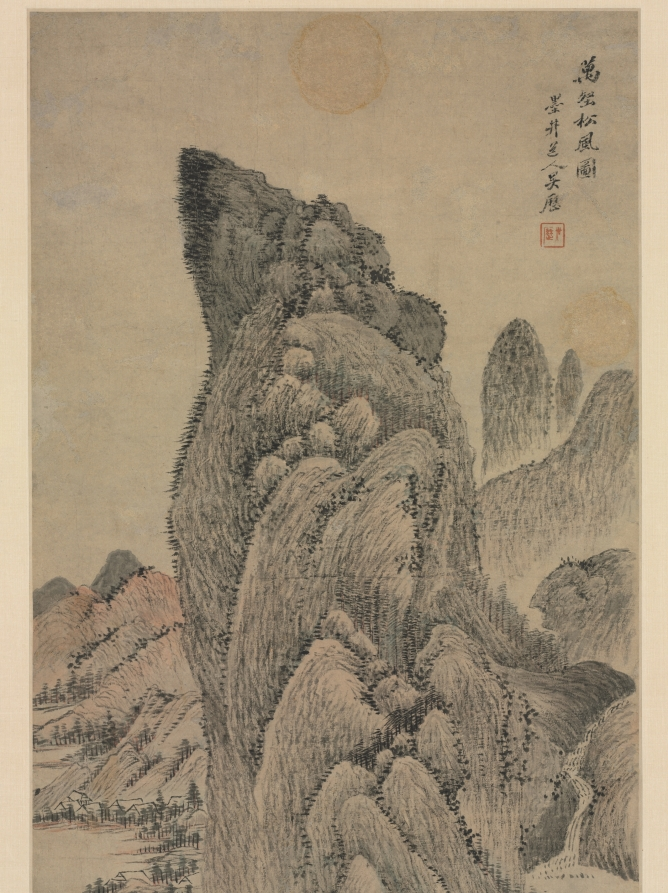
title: Pine Wind from Myriad Villages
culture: China, Qing dynasty (1644-1911)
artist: Wu Li (Chinese, 1632–1718)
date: late 1600s–1718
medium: Hanging scroll; ink and light color on paper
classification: Painting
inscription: Artist's title, signature, and 2 seals: Pine Wind from Myriad Valleys. Mojing daoren Wu Li.[seals] Mojing daoren; Wu Li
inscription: 5 additional seals: 2 of Fang Guancheng 方觀承 (1698–1768); 1 of Ma Chi-tso (1900s); 2 unidentified.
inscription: Two seals of the Qianlong emperor [r. 1736–95], probably authentic, were believed spurious and removed by a previous owner.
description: Wu Li, a native of Jiangsu province, was a talented painter, poet, and calligrapher. He studied painting with Wang Jian (1598–1677) and Wang Shimin (1592–1680), two of the “Four Wangs,” leaders of the Orthodox school of painting in the early Qing period. Through them, he also absorbed styles of earlier Ming dynasty masters. Wu was highly praised by his contemporaries and his paintings were in demand, but his interest in philosophy and religion curtailed his painting activities later in life. Wu Li converted to Christianity and in 1688 was ordained as one of the first 3 Chinese Jesuit priests. He spent the final 30 years of his life primarily in missionary work with the poor. Although this painting is undated, the sooty blackness of the ink tones and the easy self-confidence with which they are set down on paper echo recognized late works.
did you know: A figure carrying a qin, zither, walks between the buildings, perhaps intending to play music for the two men seated beneath the pines.